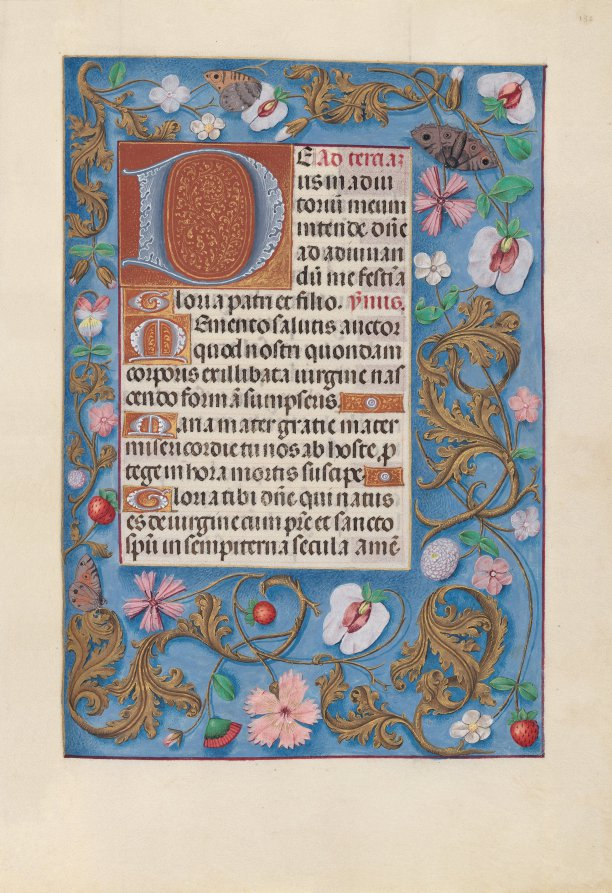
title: Hours of Queen Isabella the Catholic, Queen of Spain: Fol. 132r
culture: Flanders, Ghent and Bruges, late 15th century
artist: Master of the First Prayerbook of Maximillian (Flemish, c. 1444–1519)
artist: and Associates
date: c. 1500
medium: ink, tempera, and gold on vellum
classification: Bound Volume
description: This manuscript was illuminated by a circle of at least five highly organized manuscript painters active in the Flemish cities of Ghent and Bruges. The principal illuminator was Alexander Bening, who painted the majority of the book's miniatures. Manuscripts produced by this circle of artists are renowned for the decoration of their borders, which typically feature a rich variety of realistically-painted flowers, birds, and butterflies. This prayer book, called a book of hours, was intended not for a cleric, but for the private devotions of a lay person-in this case, Isabella the Catholic, Queen of Spain (1451-1504). Isabella's coat of arms embellishes the book's frontispiece. It is unlikely that the book was commissioned by the Queen herself; rather, she probably received it as a diplomatic gift from someone courting her patronage, perhaps Cardinal Francisco Jimenez de Cisneros. A Franciscan friar, Jimenez was dependent upon Isabella for his advancement, first to the post of Queen's confessor in 1492, and then to Archbishop of Toledo in 1495.